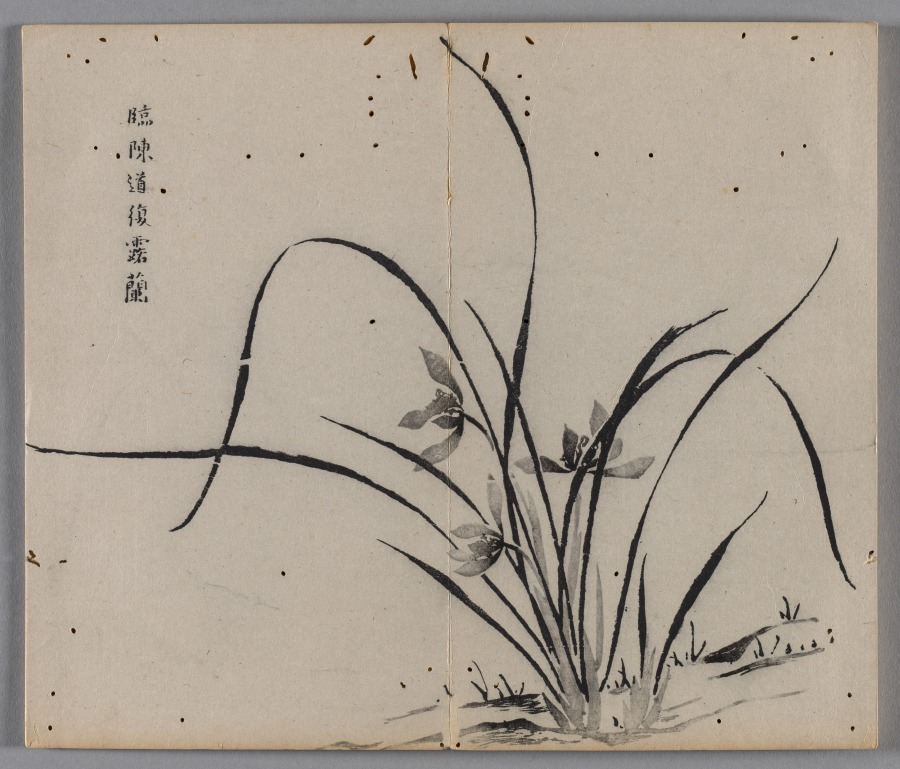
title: Ten Bamboo Studio Painting and Calligraphy Handbook (Shizhuzhai shuhua pu): Orchids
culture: China, Qing dynasty (1644-1911)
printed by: Hu Zhengyan (Chinese, c. 1584–1674)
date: 1633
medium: Woodblock-printed book; ink and colors on paper; first edition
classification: Print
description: Color printing reached a level of perfection in the early 1600s, as seen in this Ten Bamboo Studio Collection of Calligraphy and Painting and the Mustard Seed Garden Manual of Painting (printed 1679 and 1701). The painterly quality, precision in registering (aligning) the woodblocks, and harmonious colors made them the most successful color print editions in Chinese history. Both editions were printed and compiled in Nanjing, spread nationwide, and had a great impact on the arts in Japan and Korea.